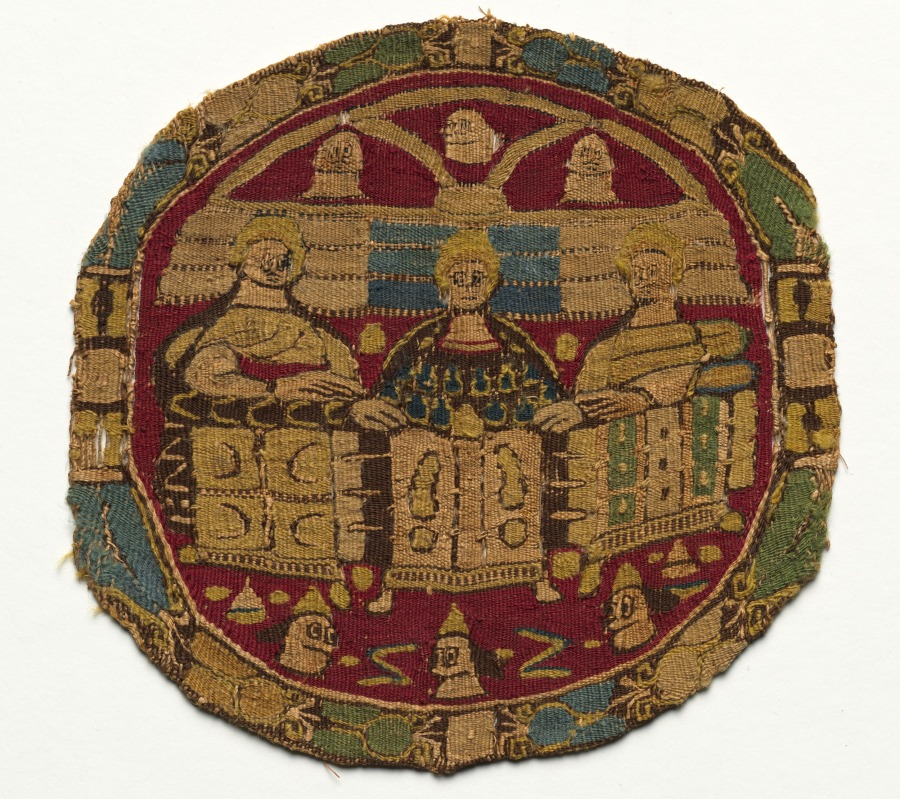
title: Pair of Segmenta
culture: Egypt, Abbasid period (?), 8th - 9th century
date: 700s - 800s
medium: tapestry; linen and wool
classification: Textile